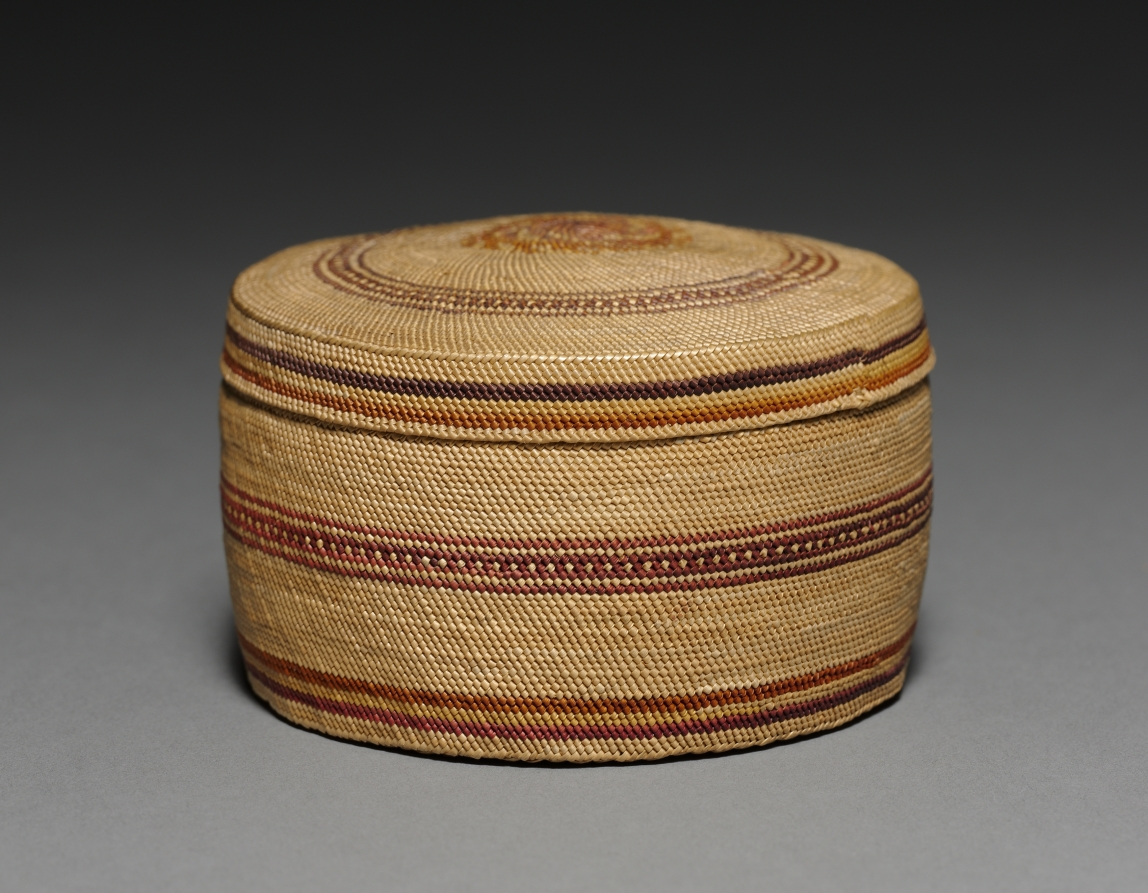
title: Lidded Bowl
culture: Northwest Coast, Makah, late 19th century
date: c 1900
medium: Cedar bark, deer grass; wrapped twining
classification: Basketry